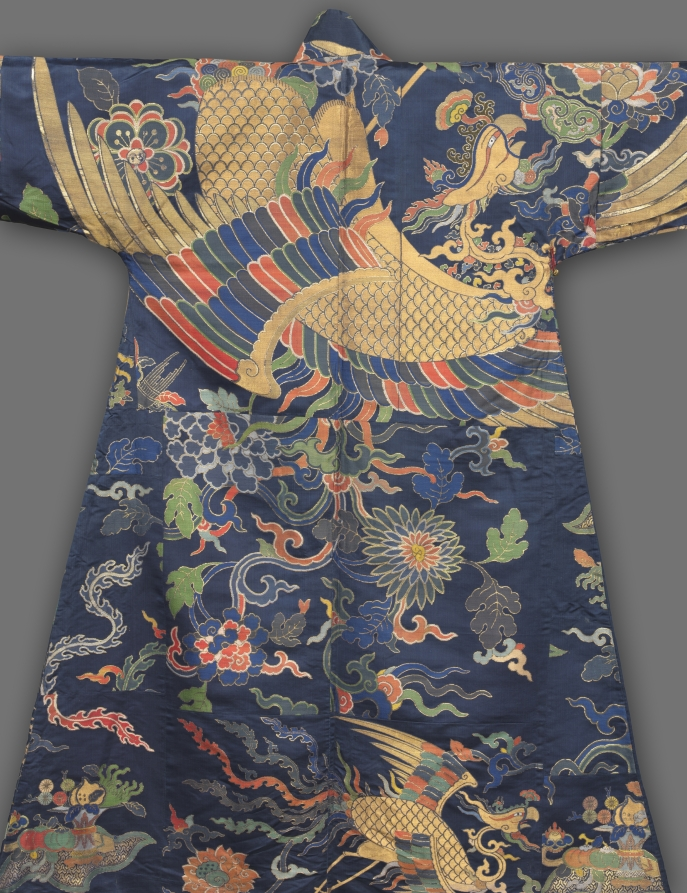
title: Tibetan Man's Robe, Chuba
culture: China, Qing dynasty (1644-1911), Kangxi period (1662-1772)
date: late 1600s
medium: Silk, gilt-metal thread of two kinds: satin weave with supplementary weft patterning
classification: Garment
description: This magnificent robe for a Tibetan lama or an aristocrat was originally a Chinese imperial wall hanging. Tibetan tailors cut it into 60 separate units, reassembling the fabric for a completely new and bold design. The wearer of such a garment must have impressed bystanders by his striking appearance. What you see here is the robe’s back side. Textiles played an important role in Chinese diplomacy with foreign governments. Diplomatic gifts of silk served to pacify border populations and to maintain balanced power relationships. Over centuries the Chinese court endeavored to keep a stable relationship with powerful Tibetan Buddhists. During the Qing dynasty (1644–1911) the Chinese court began to send gifts of court garments and furnishings to Tibet where they were altered to create Tibetan-style robes.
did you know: Large, splendid gold-thread phoenixes have pride of place on the front and back of the robe, complemented by two smaller but equally resplendent phoenixes below.